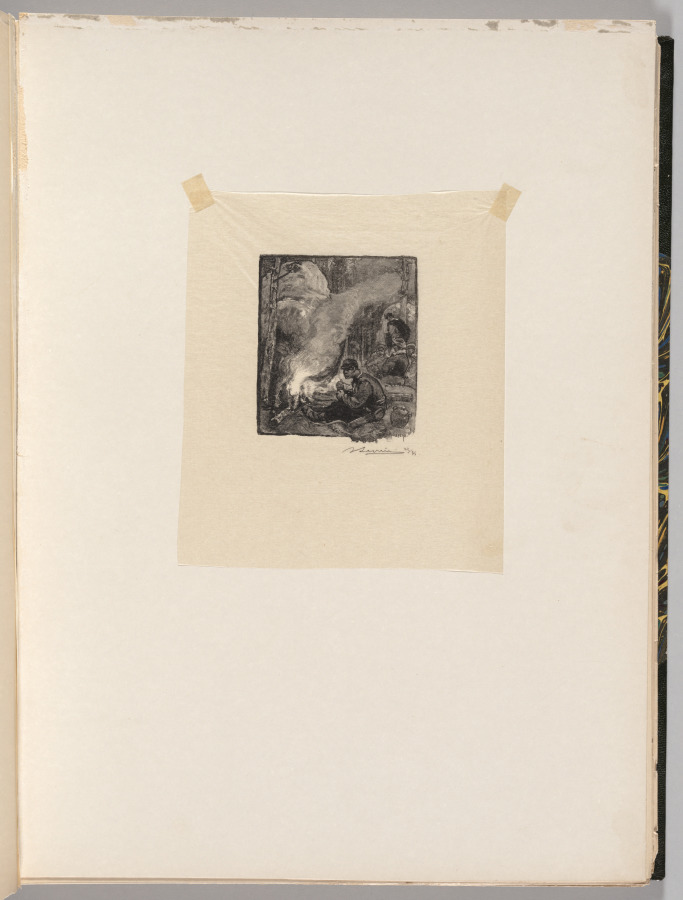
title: Woodcutters' Meal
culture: France, 19th century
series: Fontainebleau Forest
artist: Auguste Louis Lepère (French, 1849–1918)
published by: A. Desmoulins, Published in Revue Illustrée, 1887–90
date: 1890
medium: wood engraving from bound volume of 34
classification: Bound Volume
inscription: Below image, lower right, in black ink: ALepère 22/35; on block, lower right: ALepère del. sc. On window mat, lower right, in graphite: Le repas des Bûcherons